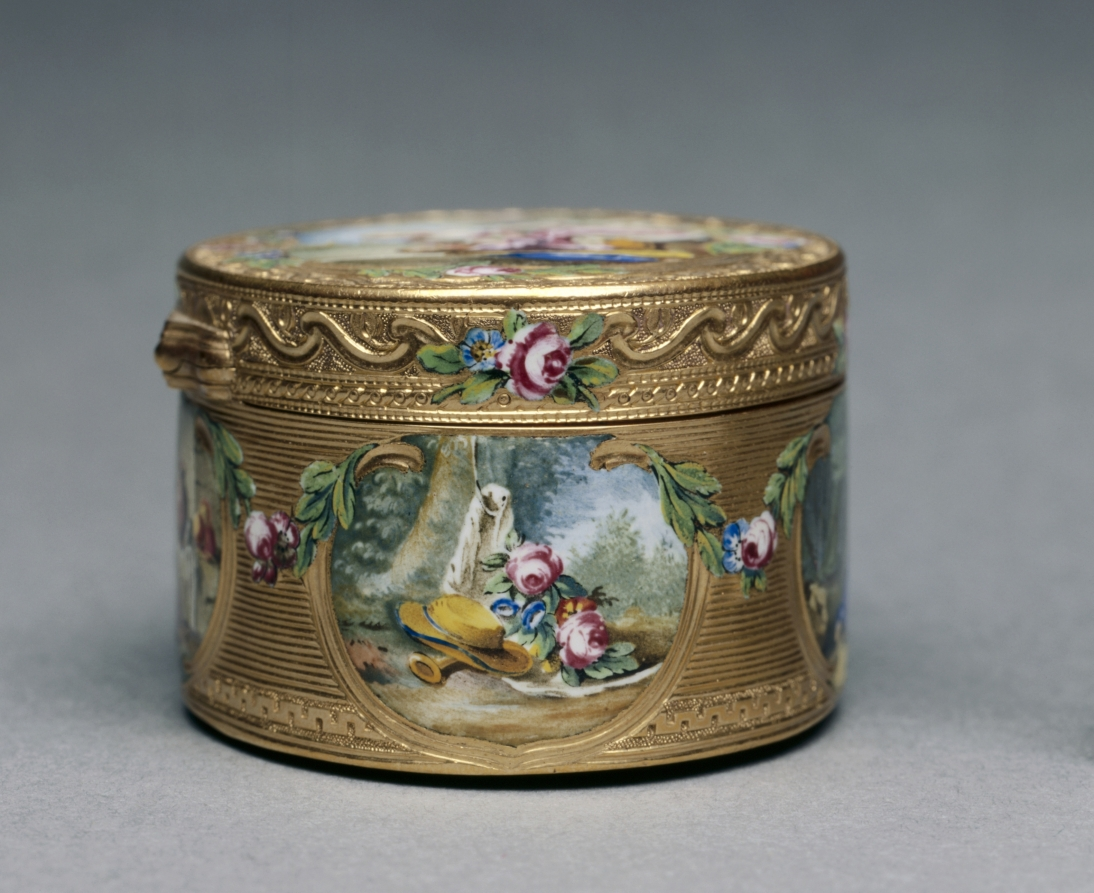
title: Snuff Box (Tabatière)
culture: France, 18th century (style of Louis XV)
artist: Francois Guillaume Tiron (French)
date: 1761–62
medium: gold and enamel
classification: Miscellaneous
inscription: [Maker's mark of Francois-Guillaume Tiron, master goldsmith in 1747, inside cover]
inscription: [Warden's mark, Paris, 1761-1762, inside cover]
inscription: [Charge mark of Eloi Brichard and Etienne Somfoye, Paris, 1756-1762, inside cover]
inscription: [Maker's mark of Francois-Guillaume Tiron, inside bottom]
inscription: [Warden's mark, 1761-1762, inside bottom]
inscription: [Charge mark of Brichard and Somfoye, inside bottom]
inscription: [Maker's mark of FG Tiron, left wall]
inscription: [Charge mark of Brichard and Somfoye, left wall]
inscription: [Warden's mark, Paris, 1761-1762, left wall]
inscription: [Discharge mark of J.J. Prevost, Paris, 1762-1768, bezel at right]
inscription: [Engraved number, maybe retailer's number]: "n. 13676"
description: The pastoral scenes that decorate this box are typical of the style of François Boucher, a celebrated painter of the period whose works were popularly reproduced on decorative arts. Snuff boxes, used practically as containers for powdered tobacco, were often decorated with miniature reproductions of notable works. The miniature on the cover is inspired by Boucher’s The Galant Pastor (Le Pasteur Gallant) (1738) and that on the bottom by The Amusement of the Shepherd Girl (L’Amusement de la Bergère) (1700s).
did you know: François Boucher was a favorite of the French royal court of Louis XV and named first painter of the king in 1765.